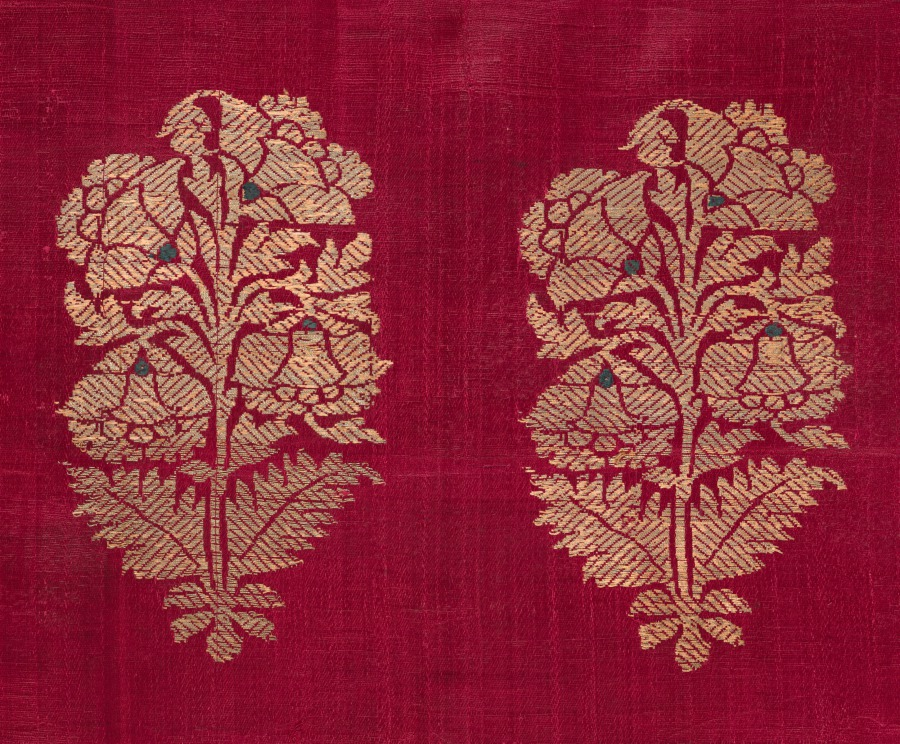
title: Brocade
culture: India, Benares ?, 18th-19th century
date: 1700s - 1800s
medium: brocade, Kimkhwab; silk and gold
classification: Textile